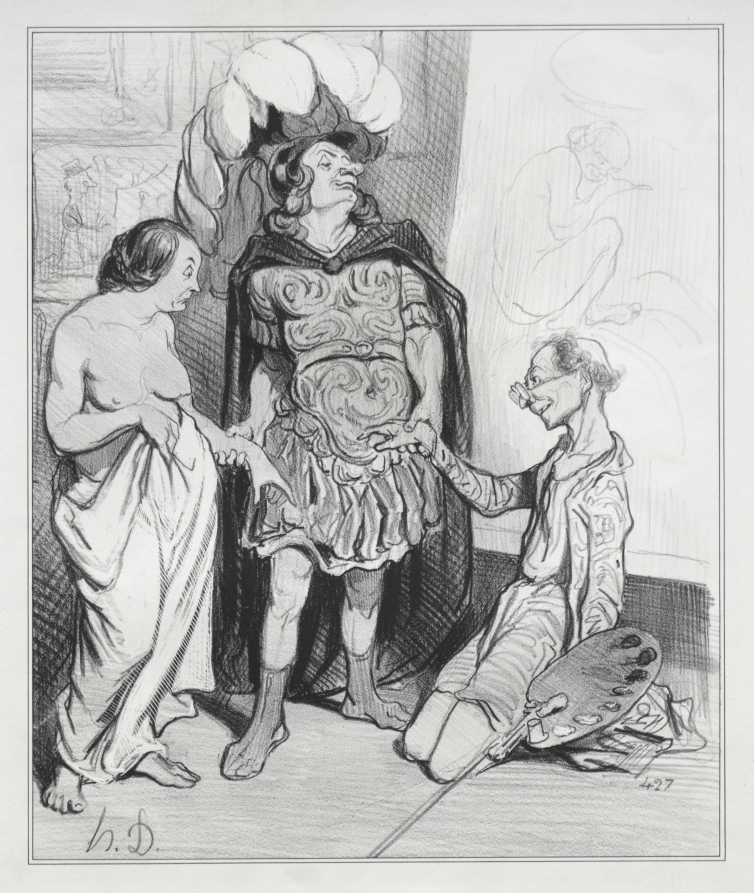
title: Apelles and Campaste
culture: France, 19th century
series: Ancient History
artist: Honoré Daumier (French, 1808–1879)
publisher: Aubert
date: 1842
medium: lithograph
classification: Print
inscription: Upper margin, in pencil: D. 1936 / I / Rare ; Lower margin, in pencil: Histoire Ancienne Pl 36 / Apelles - Campaste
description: This print is an early state (with no texts) of the print that was published in Le Charivari (November 30, 1842) as plate 36 from the series Ancient History.